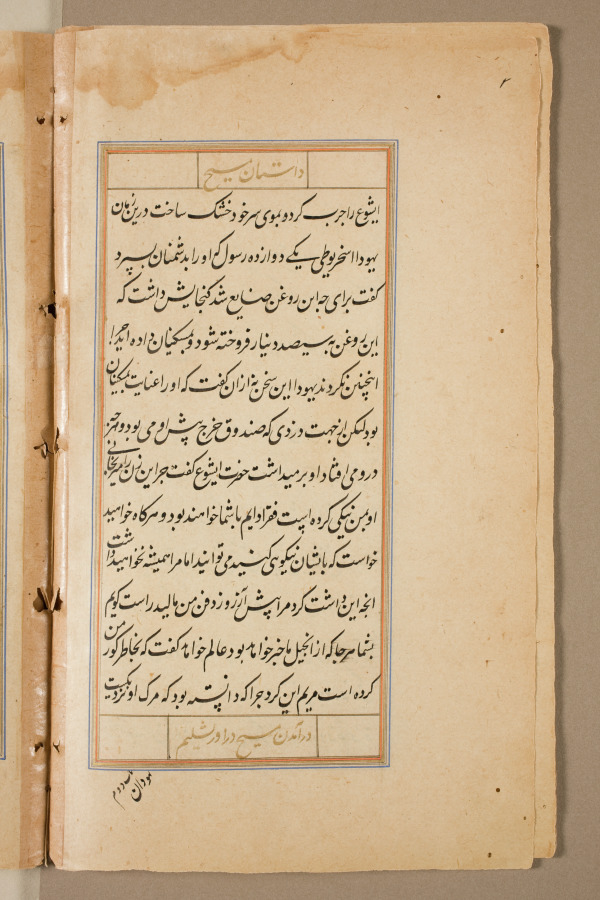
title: Text page from a Mirror of Holiness (Mir’at al-quds) of Father Jerome Xavier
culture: Mughal India, Allahabad, made for Prince Salim (1569–1627)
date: 1602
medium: Ink and gold on paper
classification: Manuscript